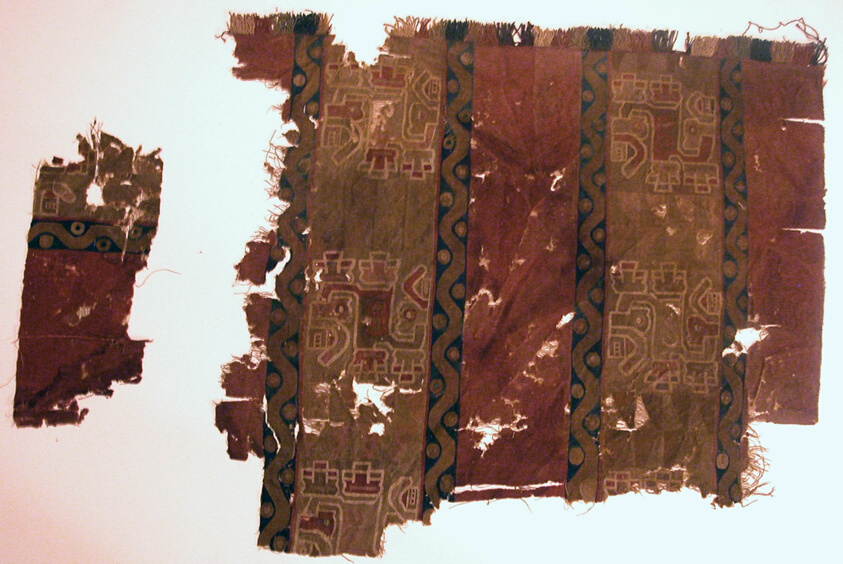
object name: Textile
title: Fragments (From a Tunic)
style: Pre-Columbian, middle horizon, americas, huari, early intermediate period, andean, andes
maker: Wari (Peru, Possibly central or south coast)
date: A.D. 600/800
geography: Peru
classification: textile; weaving